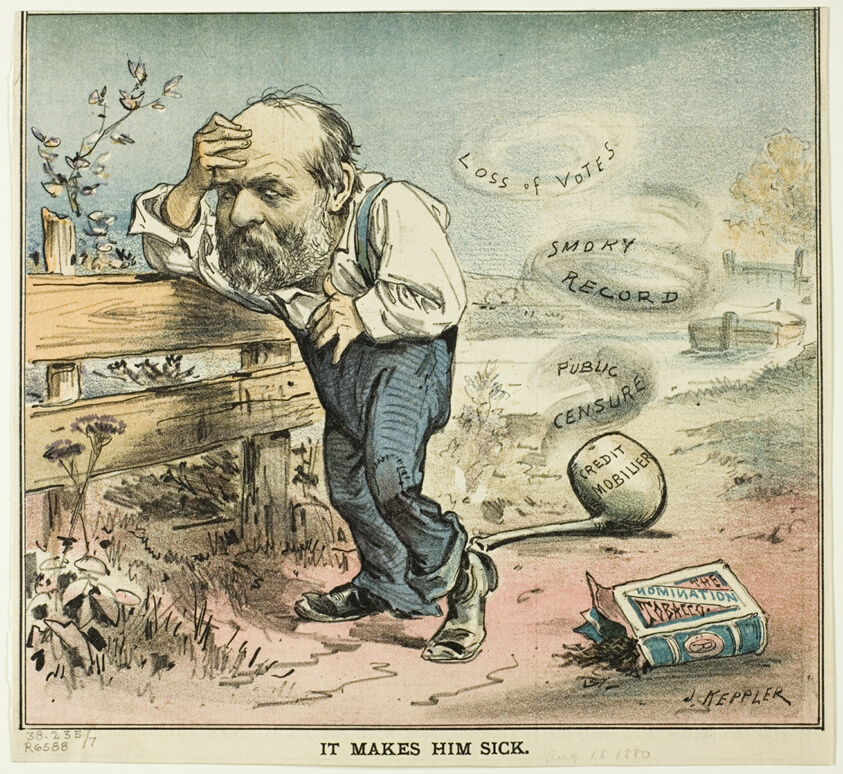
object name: Print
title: It Makes Him Sick, from Puck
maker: Joseph Keppler (American, 1638-1894)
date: published August 18, 1880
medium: Color lithograph on newsprint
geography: United States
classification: lithograph; print; prints and drawing